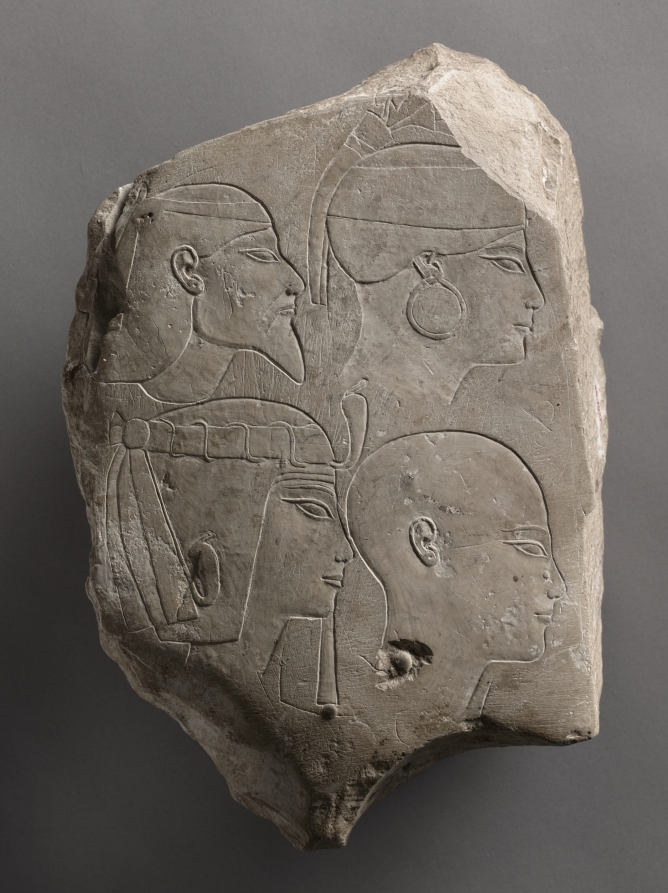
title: Trial Piece Worked on Both Sides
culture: Egypt, probably Thebes, New Kingdom (1540–1069 BCE), Dynasty 18, reign of Amenhotep III (1390–1352 BCE)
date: c. 1391–1353 BCE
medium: limestone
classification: Sculpture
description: This carved flake of limestone provides a fascinating glimpse of the ancient artist at work. One side, by far the better, features four studies of heads. At the upper left is an Asiatic. He has a low forehead, a prominent nose, and a long, pointed beard. To his right is a Nubian wearing the short, round headdress and large loop earring that the Egyptians usually identified with this ethnic group. The bottom row presents images from within Egypt. At the left is a stock image of a king. To his right is another Egyptian, whose clean-shaven head immediately identifies him as a priest.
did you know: Trial pieces were a necessity of this busy building period because new styles were continually introduced and rapid training of apprentices was needed.